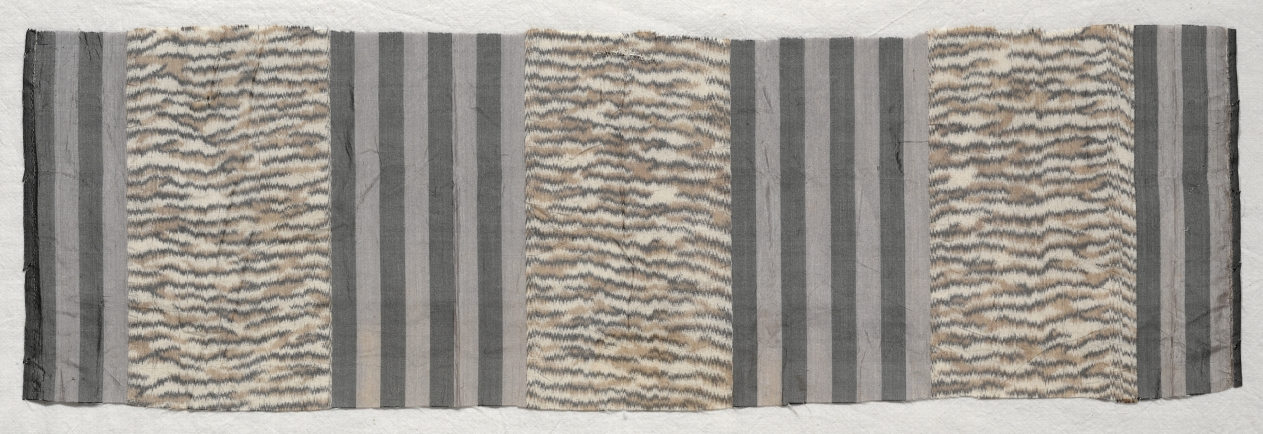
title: Silk with Gray and Purple Stripes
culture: France, early 19th century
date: early 1800s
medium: silk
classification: Textile